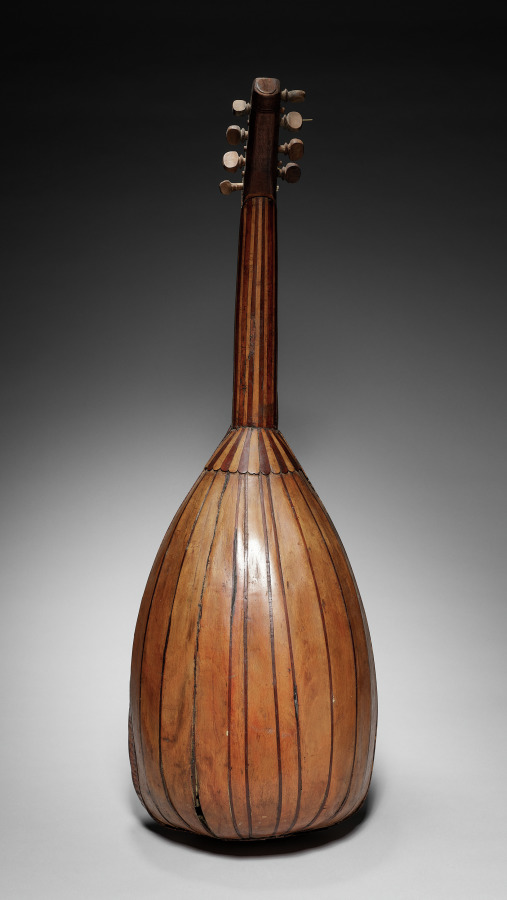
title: Lute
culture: Italy, Venice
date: 1300s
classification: Musical Instrument